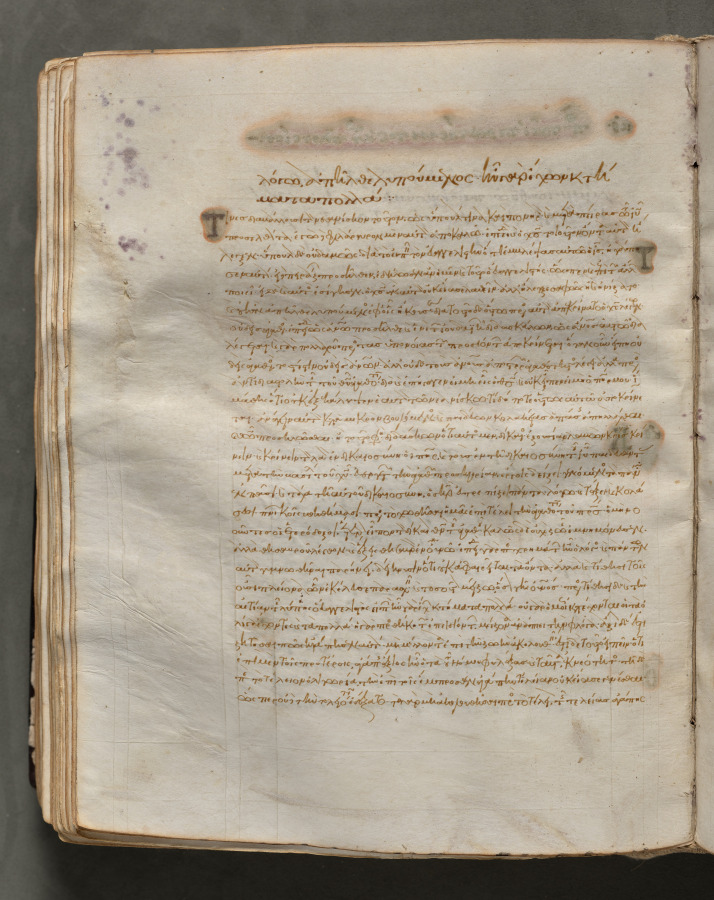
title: Text, folio 169 (verso), from a Gospel Book with Commentaries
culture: Byzantium, Constantinople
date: c. 1000–1100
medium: ink, tempera, and gold on vellum; leather binding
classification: Bound Volume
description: Each of the four gospels in this book opens on a page with brilliantly illuminated borders depicting the author of the text as well as birds-principally peacocks, symbols of the immortality of the soul-and fountains, representing the fountain of life and the salvation of the soul. This volume consists of 428 leaves with texts in Greek. Its level of sophistication suggests that it was probably written and decorated in a monastery in Constantinople.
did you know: Gospel Books were carried in procession through Byzantine churches.